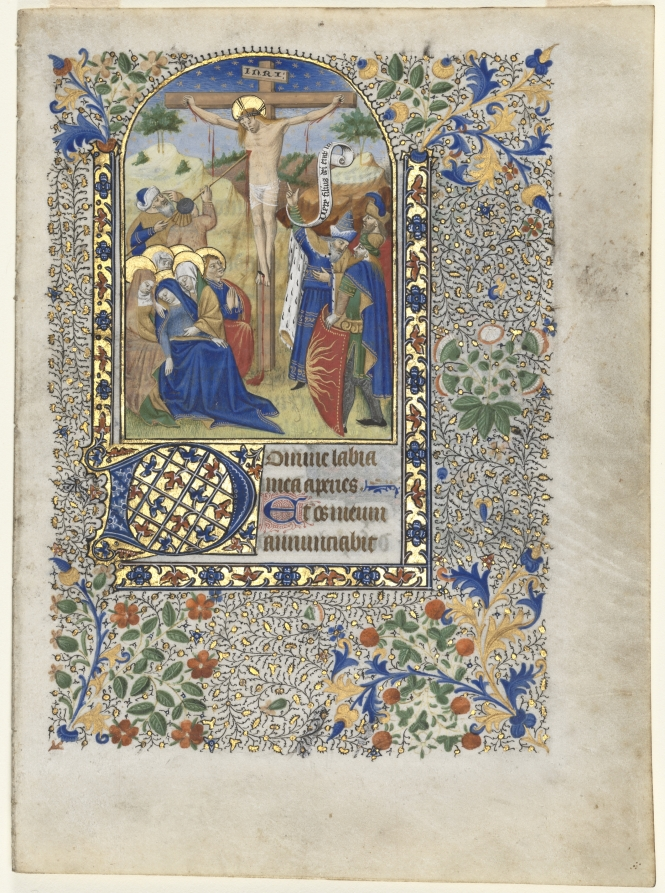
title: Bifolio from a Book of Hours: The Crucifixion (recto), Text (verso)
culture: France (Angers, Nantes, or Poitiers)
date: c. 1435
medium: ink, tempera, and gold on vellum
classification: Manuscript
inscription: Domine labia mea aperies et os meum adnuntiabit…[laudem tuam]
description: In most books of hours, the Hours of the Cross and the Hours of the Holy Spirit are much shorter than the Hours of the Virgin. Like the Hours of the Virgin, each hour consists of specific hymns, devotional poems, and prayers to be said throughout the day. Accompanying illustrations are either events surrounding the Crucifixion or the Pentecost, the descent of the Holy Spirit on the disciples of Jesus after his ascension to heaven. Traditionally, the Hours of the Cross begins with a scene of the Crucifixion of Christ. The illumination, or illustration, can help determine which series is indicated, as the Hours of the Cross and Holy Spirit begin with the same text. After 1400, such text no longer appeared solely in Latin but could be in French or Dutch, making it more accessible to laypeople.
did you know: The images and decorated initials in the book of hours were used to provoke meditation and prayer, leading to books of hours sometimes being referred to as “painted prayers.”